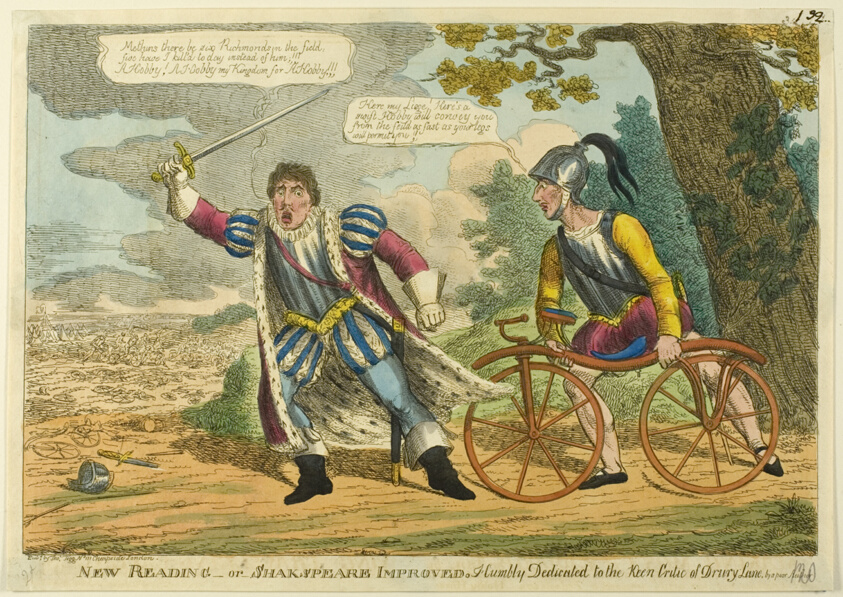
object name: Print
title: New Reading, or Shakspeare [sic] Improved. Humbly Dedicated to the Keen Critic of Drury Lane, by a Poor Author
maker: Charles Williams (English, active 1797-1830); published by Thomas Tegg (English, 1776-1845)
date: 1819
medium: Hand-colored etching on cream wove paper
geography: England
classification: etching; print; prints and drawing